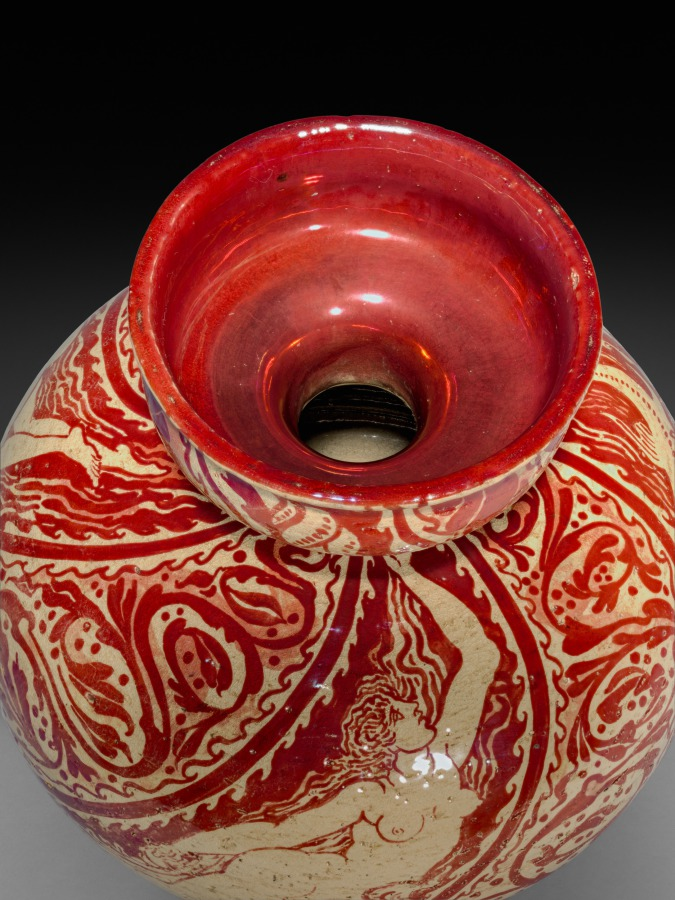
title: Vase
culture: Britain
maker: Walter Crane (British, 1845–1915)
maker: Maw & Co. (British (modern), 1850–1969)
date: 1889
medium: Earthenware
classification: Ceramic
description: Walter Crane was one of the leading figures of the British Arts and Crafts movement. His work helped establish a renewed interest in Renaissance ceramics and the importance of illustration in decorative ceramics. He collaborated with several major manufacturers of decorative furnishings including Maw & Co., an important manufacturer of aesthetic period tiles and other decorative ceramics. This vase is one of a series of vases that Crane designed for Maw around 1889 when they first appear listed in the catalogue of the Arts and Crafts Exhibition Society in London of that year, described along with a series of tiles that Crane also designed for Maw. Its brilliant ruby-red luster surface is a hallmark of Maw’s work featuring Crane’s lyrical designs while referencing earlier 15th- and 16th-century Spanish lusterware.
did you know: The red glaze on this vase resembles the color of oxblood.